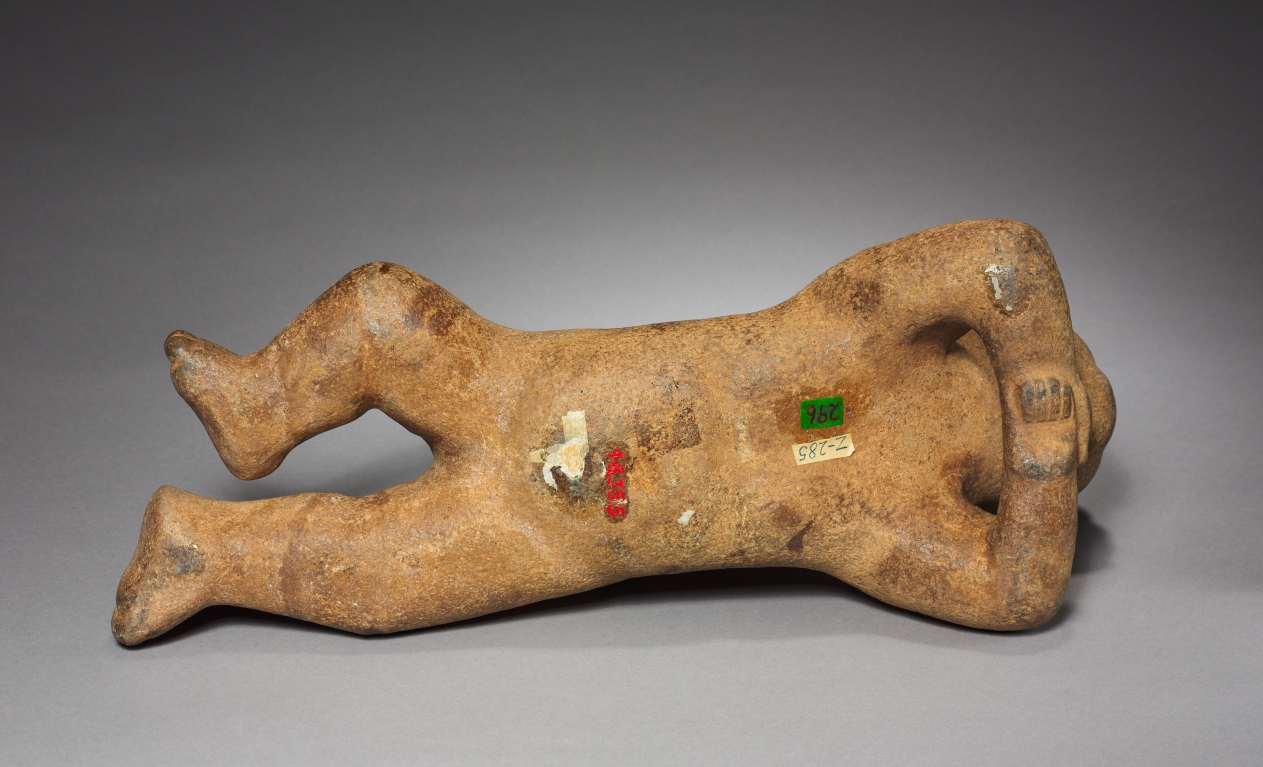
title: Reclining Figure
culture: Mexico, Gulf Coast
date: 300–600 CE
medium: stone, pigment traces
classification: Sculpture